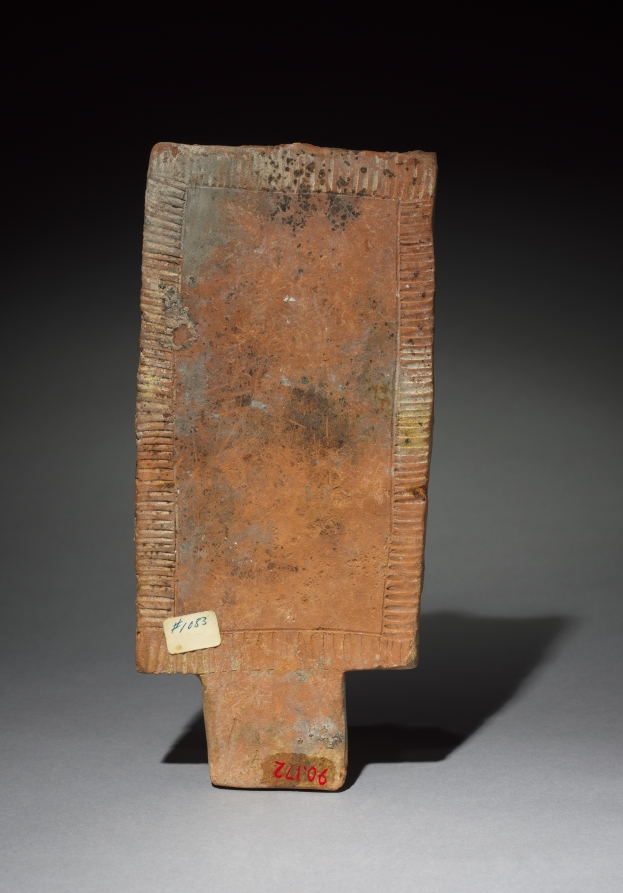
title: Figurine with Back Rack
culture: Mexico, Maya, Jaina style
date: 300–900 CE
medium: molded and modeled pottery with traces of pigment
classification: Sculpture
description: Maya figurines—made by hand, with molds, or sometimes a combination of the two techniques—represent a wide range of human, animals, and supernatural beings. This example is a male with an enormous backrack, an article of ceremonial attire worn by dancers and other courtly personnel. Figurines have been found in tombs and offerings but also in household contexts.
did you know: Figurines from Jaina, an elite Maya burial ground, served as companions for the dead.